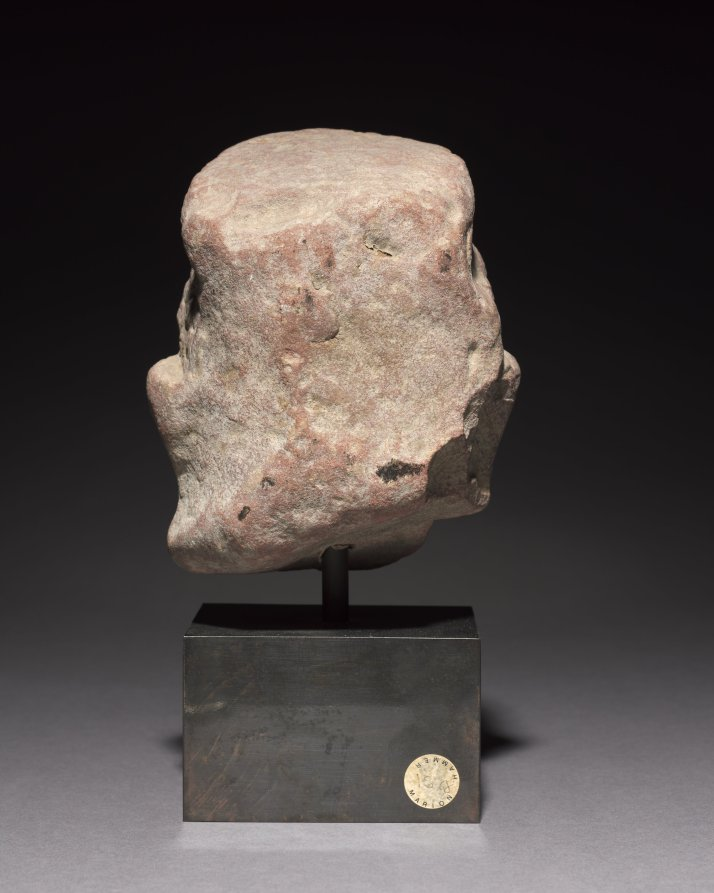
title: Head of Kubera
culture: Northern India, Mathura, Kushan period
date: 200s CE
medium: spotted red sandstone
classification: Sculpture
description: Kubera is the god of wealth, and he is most often depicted with a moustache during this period.